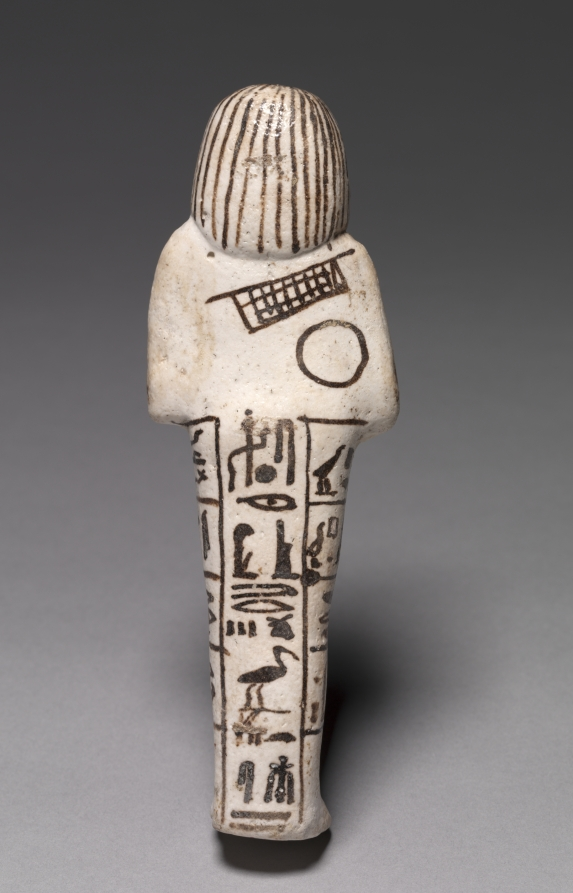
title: Shawabty of Djehutymose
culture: Egypt, New Kingdom (1540–1069 BCE), Dynasty 19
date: c. 1279–1213 BCE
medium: polychrome faience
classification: Funerary Equipment